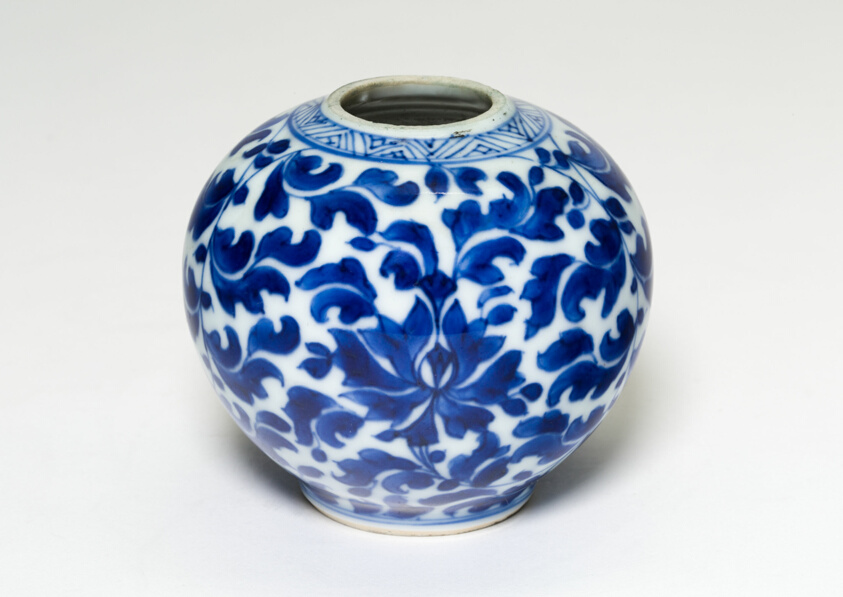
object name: Vessel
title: Jar with Floral Scrolls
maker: China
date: Qing dynasty (1644–1911), Kangxi period (1662–1722)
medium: Porcelain painted in underglaze blue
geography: China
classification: stoneware; asian art; ceramics; vessel